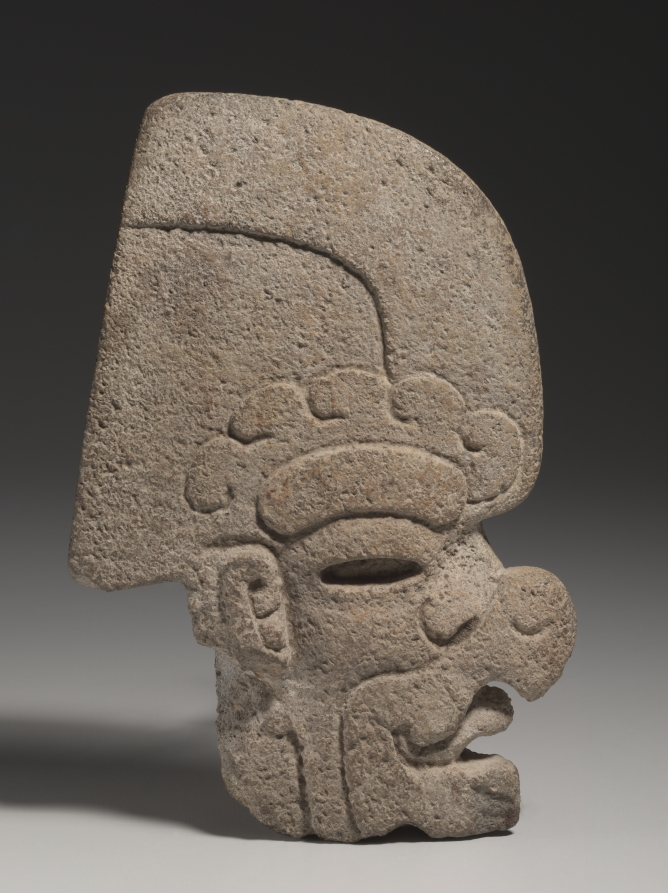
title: Ballgame Thin Stone Head (Hacha)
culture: Mexico, Gulf Coast, Classic Veracruz style (600-1100)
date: 600–900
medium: stone, pigment traces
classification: Sculpture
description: In contrast to other ballgame sculptures on display, it seems unlikely that thin stone heads, known as hachas, are renditions of actual ballgame gear. Their use remains unclear, but the notch at the back of most examples suggests they might have served as architectural ornaments during play or game ceremonies. Also, in a few artistic depictions of game ceremonials, such heads rest upon U-shaped hip protectors, like one nearby.